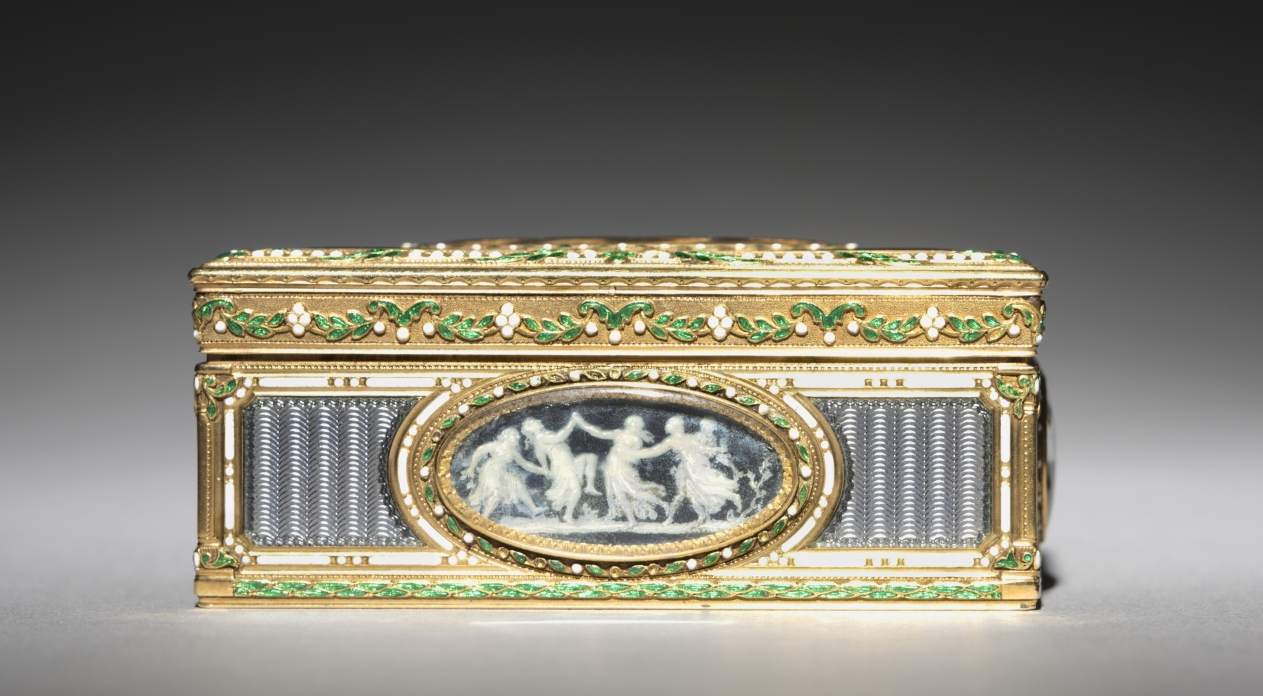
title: Snuff Box (Tabatière)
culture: France, 18th century (style of Louis XVI)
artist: François Chazeray (French)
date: 1777–78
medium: gold and enamel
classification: Metalwork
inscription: [Maker's mark of François Chazeray, master goldsmith in 1760, cover; bottom; front wall]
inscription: [Warden's mark (probably a crowned "O"), Paris, 1777-1778, cover; bottom; front wall]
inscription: [Illegible mark, bottom]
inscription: [Illegible mark, cover]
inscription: [Illegible charge mark, inside front]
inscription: [Discharge mark of Jean-Baptiste Fouache, Paris, 1774-1780, on neck at left.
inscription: [Outside of neck, modern inscription '4 (modern inscription]:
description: This box is decorated with figures of antiquity associated with love: winged cupids, dancing nymphs, and representations of the Greek goddess of love. These scenes are inspired by antique cameos, intricately carved gemstones crafted in ancient Greece and Rome. This interest in ancient iconography, symmetry, and classical compositions of gods and goddesses was characteristic of 18th-century neoclassicism.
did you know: Decorated with allegorical scenes of love, it is likely that this box was a present between lovers.